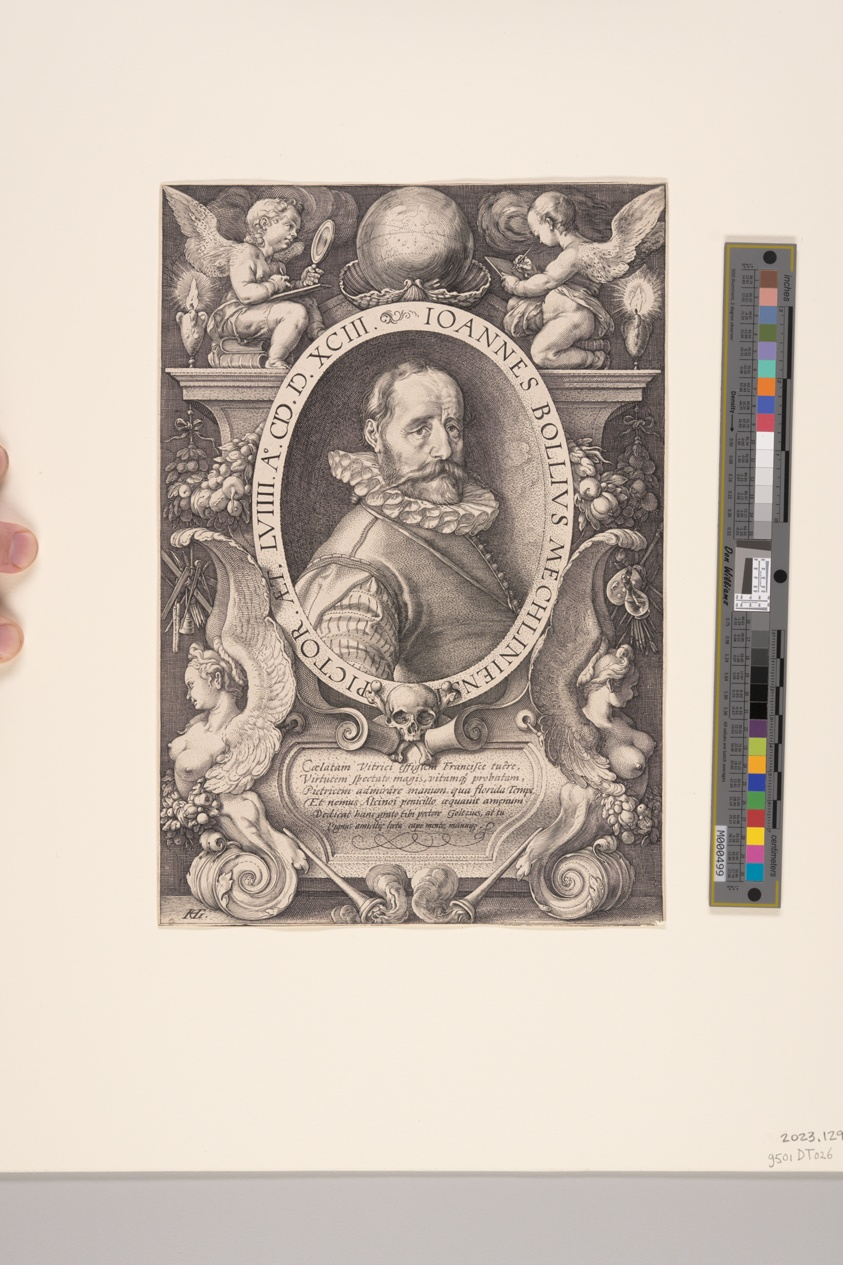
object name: Print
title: Hans Bol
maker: Hendrick Goltzius (Dutch, 1558–1617)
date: 1593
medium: Engraving on laid paper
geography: Netherlands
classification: engraving; paper; print; prints and drawing